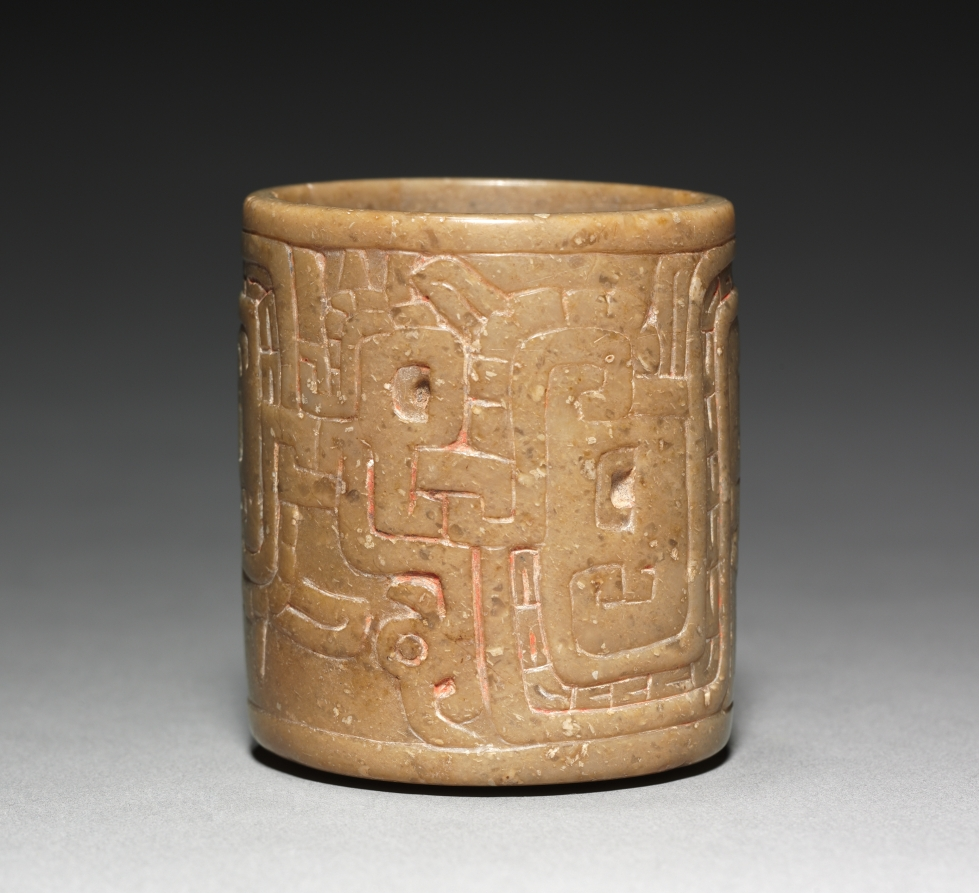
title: Cup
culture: Peru, North Coast, Cupisnique style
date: c. 900–600 BCE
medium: steatite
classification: Stone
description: While Chavín held sway in the highlands, coastal artists produced many objects in non-Chavín styles. Such is the case with these small, finely carved, stone containers, which were part of north coast ritual paraphernalia, though their specific use is unclear. Both bear complex designs based on fanged heads in profile that lack lower jaws.